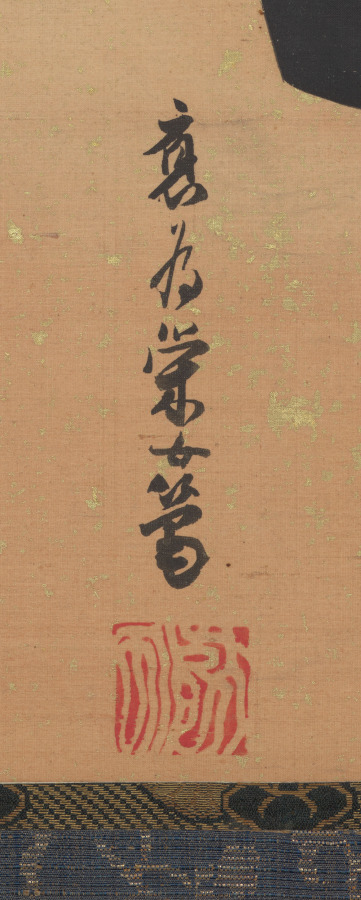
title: Operating on Guan Yu's Arm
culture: Japan, Edo period (1615–1868)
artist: Katsushika Ōi (Japanese, c. 1800-after 1857)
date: 1840s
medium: hanging scroll; ink, color, and gold on silk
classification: Painting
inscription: 款記「應為栄女筆」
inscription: 「葛しか」白文方印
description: Ukiyo-e artists’ subject matter extended to popular literature. Katsushika Ōi used color to great effect in her gruesome version of an episode from a 14th-century Chinese novel, Romance of the Three Kingdoms. Ōi portrayed the passage in which legendary 3rd-century military leader Guan Yu undergoes a bone scraping to remove poisons received from an arrow wound. In this sensationalist portrayal, Guan Yu’s attendants cower at the sight of his bloody arm while he remains unflinchingly focused on his game. As a woman, Ōi was an outlier in her era, but her talent was allowed to shine due to collaboration with her father, Katsushika Hokusai (1760–1849), the famed designer of the print known as The Great Wave.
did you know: This is the largest surviving painting by the artist.